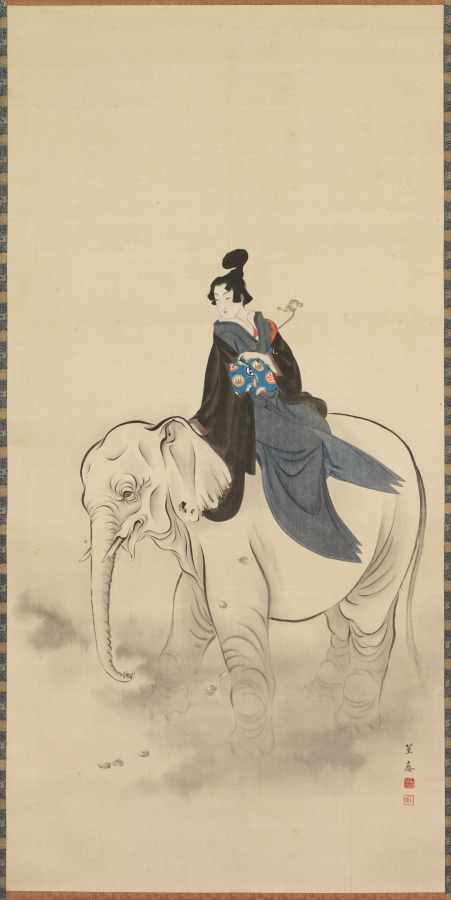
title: Stand-in Fugen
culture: Japan, Edo period (1615–1868)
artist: Kitao Masayoshi (Japanese, 1761–1824)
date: late 1700s–early 1800s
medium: hanging scroll; ink and color on silk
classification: Painting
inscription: artist's signature and two seals, lower right.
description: Here, a woman dressed as a man replaces Fugen, a bodhisattva—a being among those considered enlightened in Buddhism—who symbolizes learning as a path to awakening and typically rides an elephant. The painting teaches the lesson of impermanence through the petals falling from the lotus flower the woman holds. It also alludes to the legend of Eguchi, a 12th-century courtesan who, following an encounter with a Buddhist monk-poet called Saigyō, revealed herself to be a manifestation of Fugen.